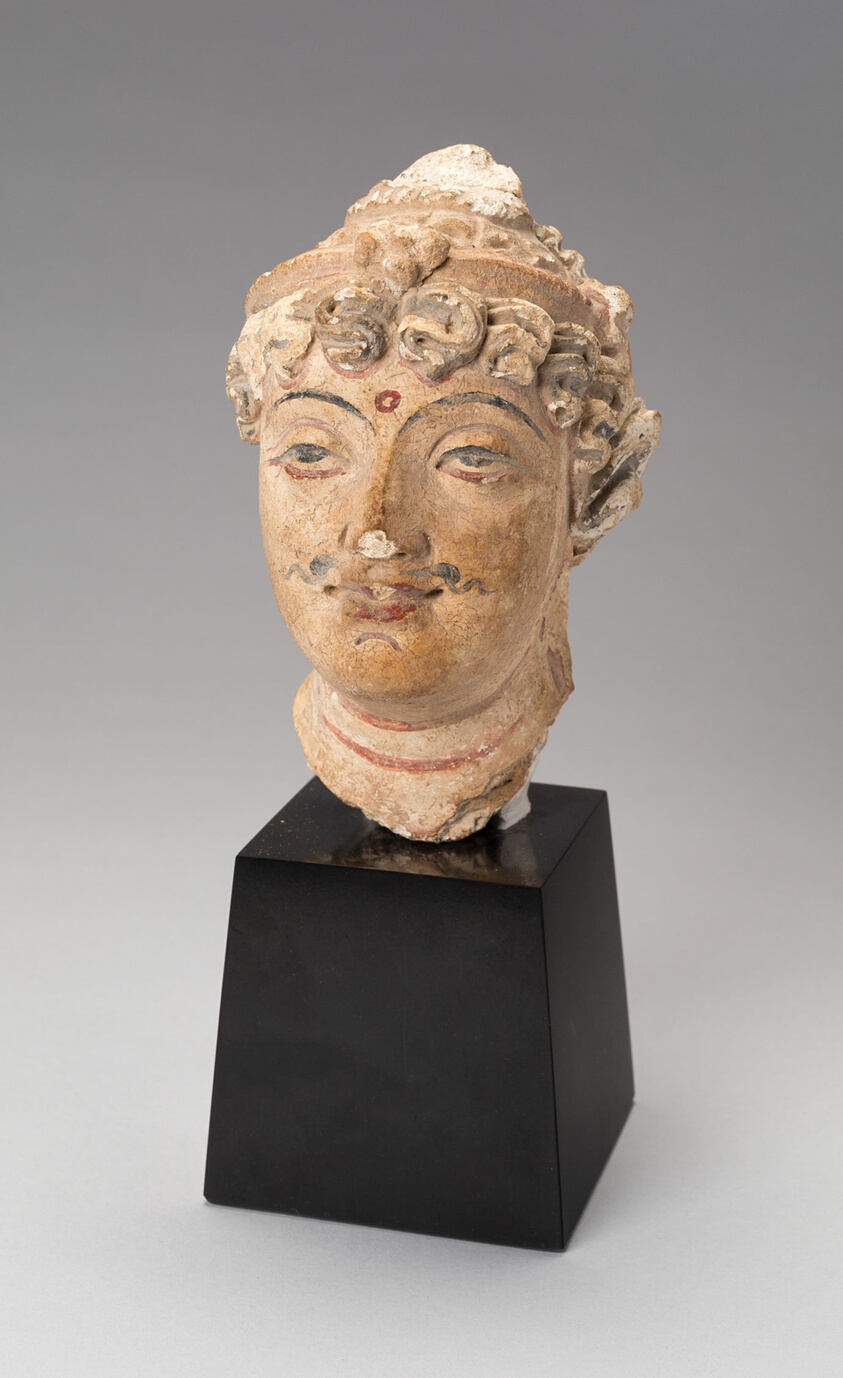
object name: Sculpture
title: Head of a Bodhisattva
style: South Asian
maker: Afghanistan or Pakistan; Ancient region of Gandhara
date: 3rd/5th century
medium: Stucco with red and black pigment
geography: Gandhara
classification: stuccowork; sculpture; asian art